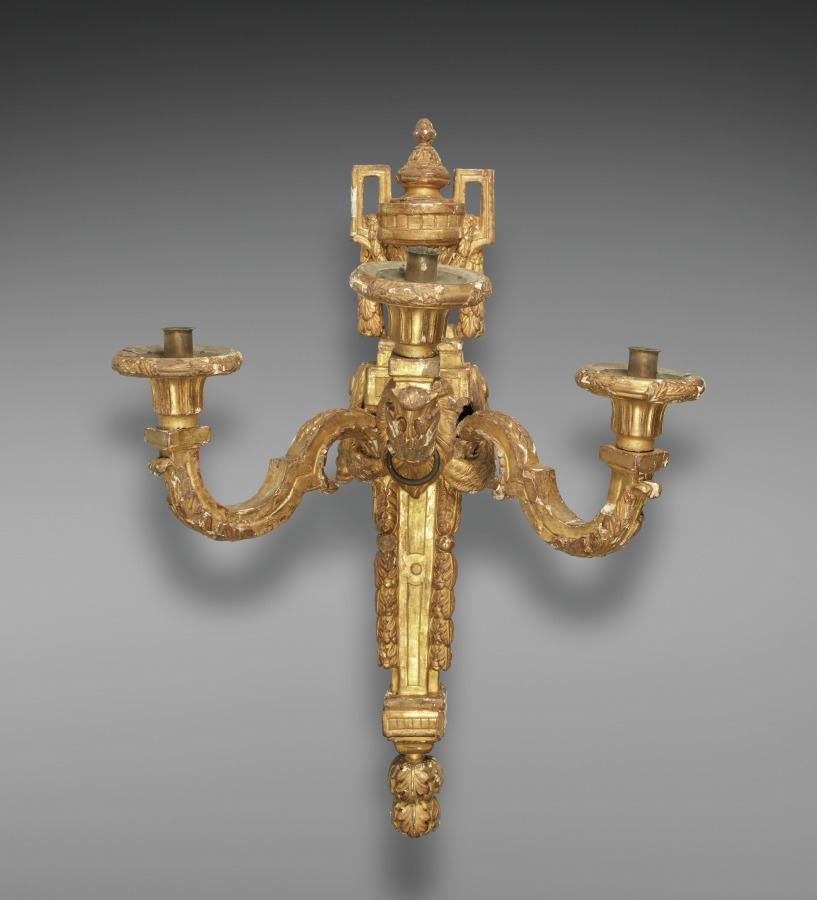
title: Candle Bracket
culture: France, style of Louis XVI, 18th century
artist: after a design by Jean Charles Delafosse (French, 1734–1789)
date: c. 1765–1775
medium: carved and gilded wood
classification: Furniture and woodwork